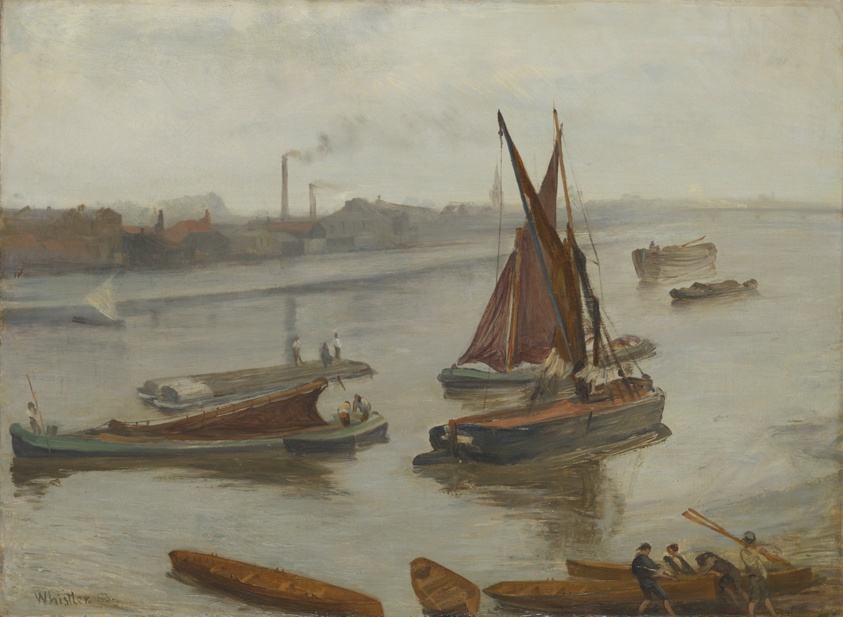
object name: Painting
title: Grey and Silver: Old Battersea Reach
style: Impressionism, Modernism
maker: James McNeill Whistler (American, 1834–1903)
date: 1863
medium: Oil on canvas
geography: London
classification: painting; american arts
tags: landscapes, Century of Progress, world's fairs, Chicago World's Fairs